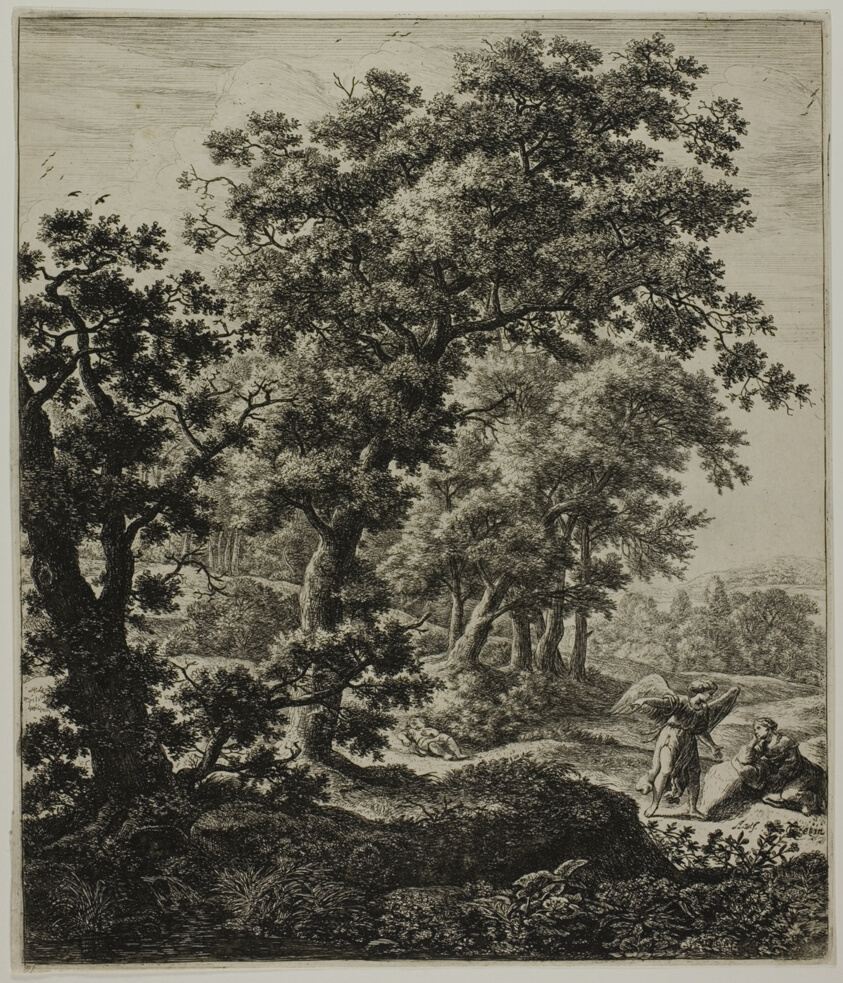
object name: Print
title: Hagar Comforted by the Angel, from Six Large Upright Landscapes with Scenes from the Old Testament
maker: Anthonie Waterloo (Dutch, c. 1610-1690)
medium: Etching in black on ivory laid paper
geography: Holland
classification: etching; print; prints and drawing